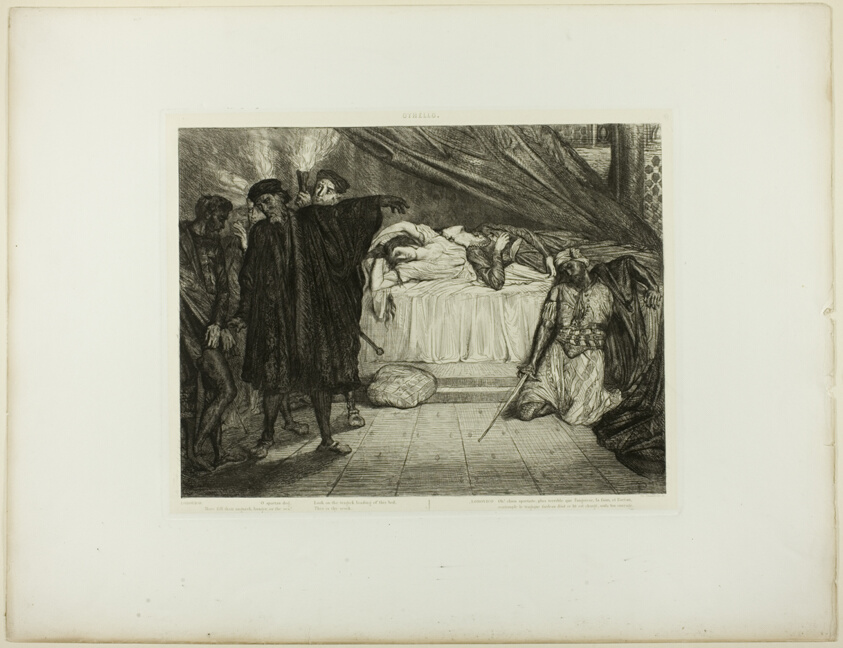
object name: Print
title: O Spartan dog, plate fifteen from Othello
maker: Théodore Chassériau (French, 1819-1856)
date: 1844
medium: Etching, engraving, roulette and drypoint on ivory China paper, laid down on white wove paper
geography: France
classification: etching; print; prints and drawing